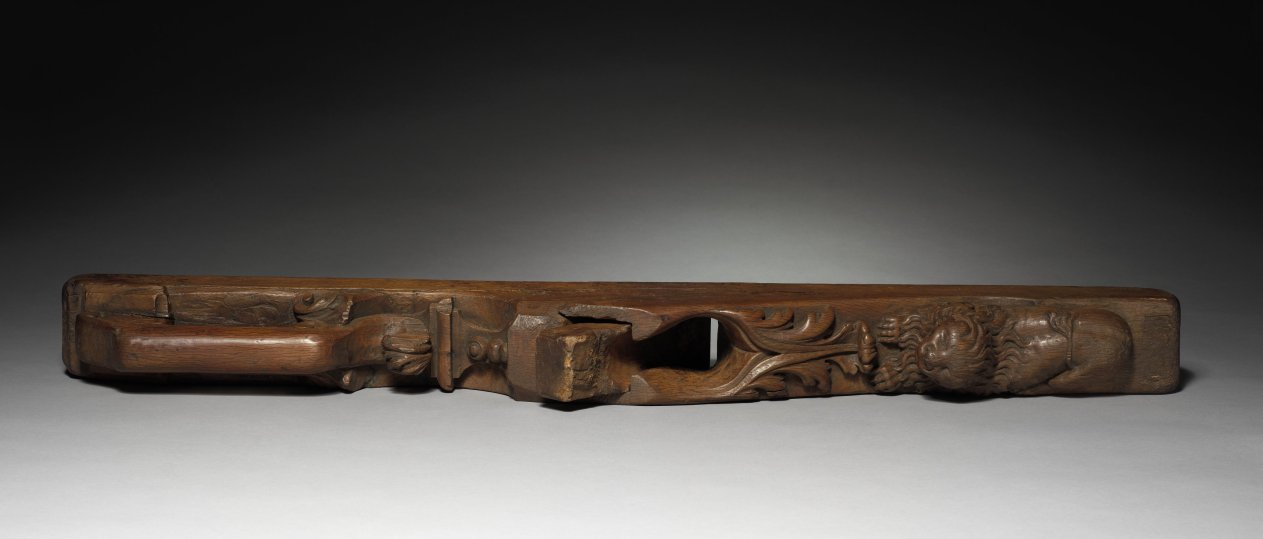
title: Plane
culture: Spain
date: 1600s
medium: oak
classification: Tool